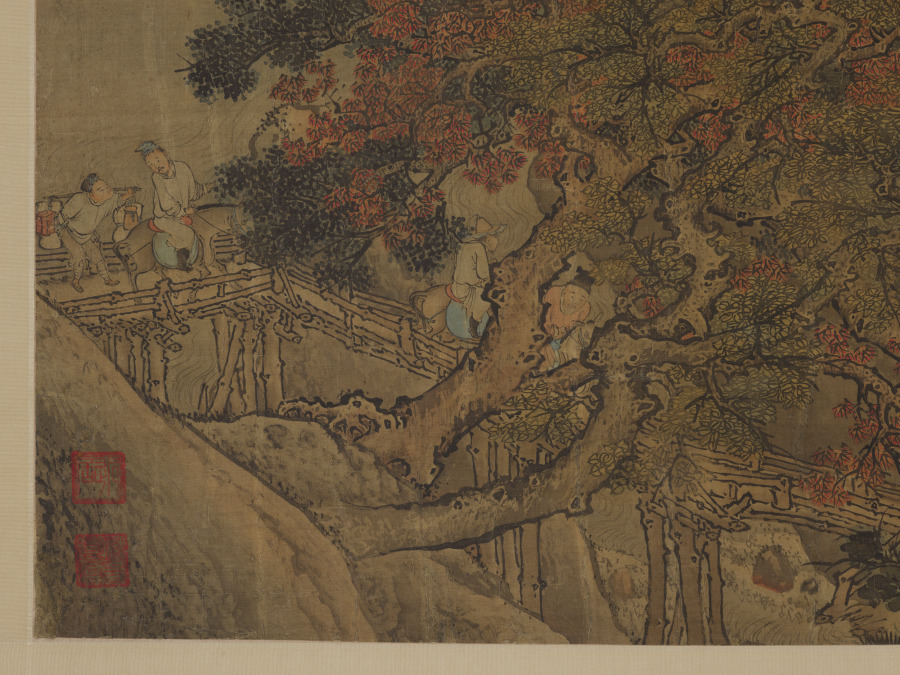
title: Road to Shu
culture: China, Qing dynasty (1644–1911), Qianlong reign (1736–95)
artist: Yuan Yao (Chinese, active mid-1700s)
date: 1743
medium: Hanging scroll; ink and color on silk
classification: Painting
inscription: artist's seals: yuan yao shi yin 袁耀 之印, zhao dao shi 昭道 氏 two collector’s seals: jin ju and illegible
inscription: Shu han xinglü //shi guihai xia //Hanshang Yuan Yao hua// 蜀椷行旅时癸亥夏- 邗上 袁耀 画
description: Few works by the Yuan workshops in Yangzhou present a continuous composition of such monumental scale as this hanging scroll. Road to Shu (in Sichuan province) depicts the trade of goods over long distances and through mountainous terrain. Busy travelers lead mules over footbridges, mountain paths wind along steep slopes, and soaring bridges connect peaks divided by deep gorges. The Yuan studios produced paintings to decorate the residences of wealthy Yangzhou salt merchants and princely palaces. The title Road to Shu refers to the historical drama of the flight of Tang emperor Xuanzong (reigned 712–56) to Sichuan in the aftermath of the An Lushan Rebellion (755–63). At the same time, the scenery alludes to Anhui, the mountainous native country of many of the salt merchants and their trade routes in northern parts of the empire.